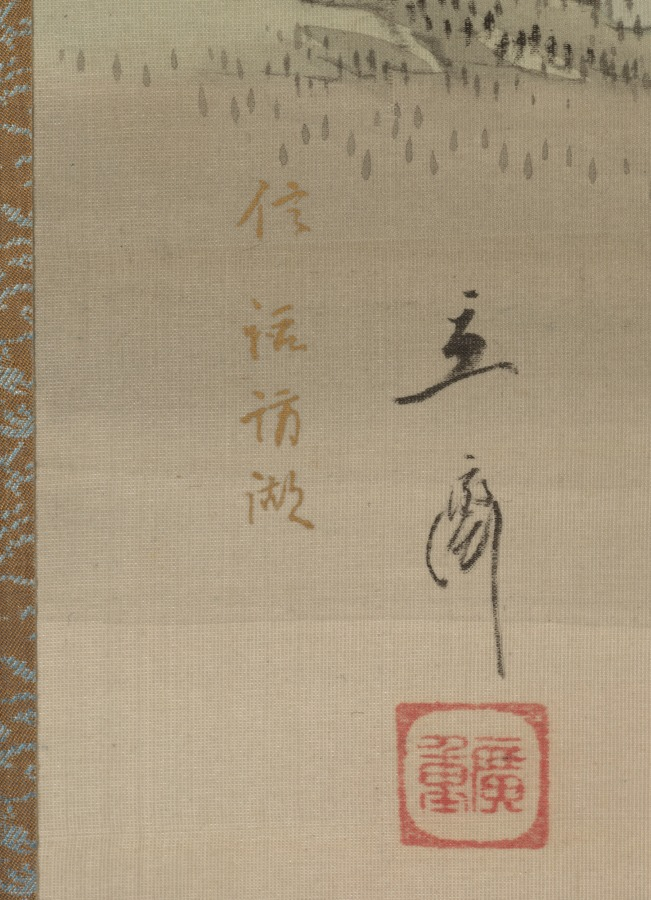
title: Lake Suwa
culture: Japan, Edo period (1615–1868)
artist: Utagawa Hiroshige (Japanese, 1797–1858)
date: c. 1832–58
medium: hanging scroll; ink and color on silk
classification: Painting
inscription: 立斎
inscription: 廣重